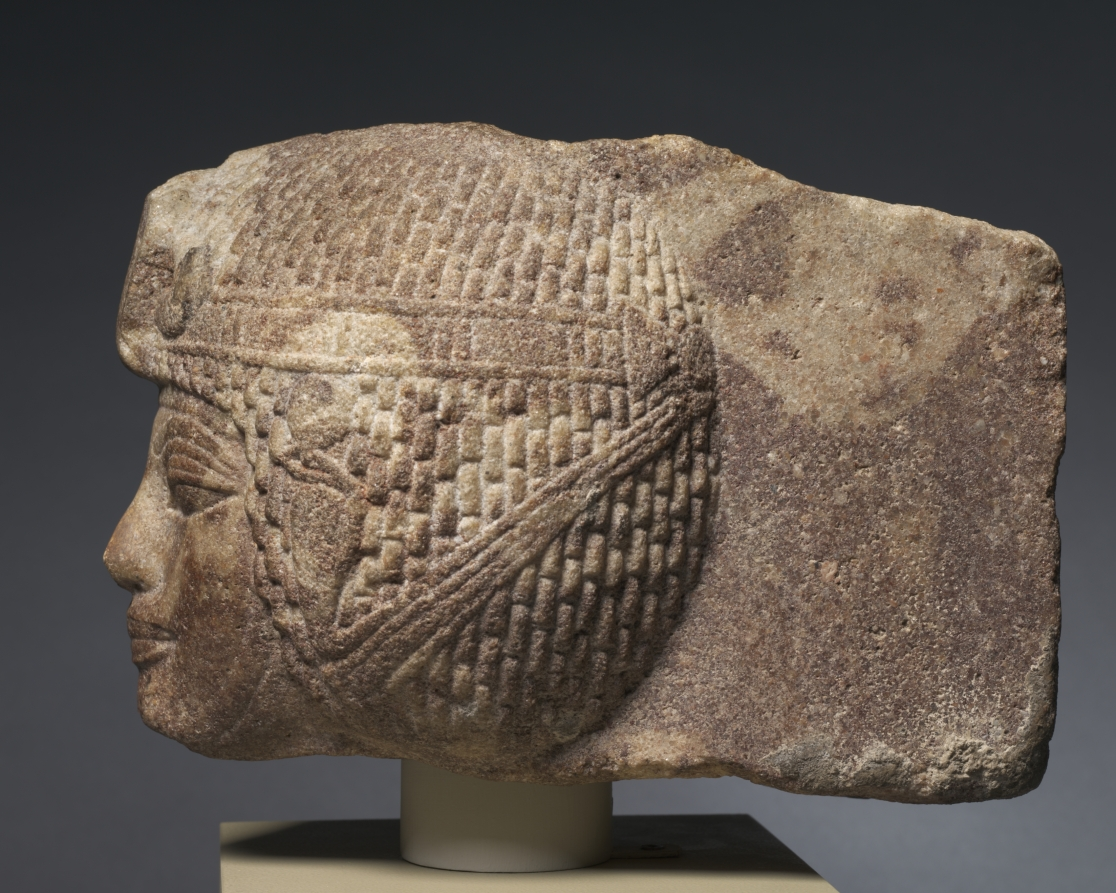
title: Head of Amenhotep III Wearing the Round Wig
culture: Egypt, New Kingdom (1540–1069 BCE), Dynasty 18, reign of Amenhotep III (1390–1352 BCE)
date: c. 1391–1353 BCE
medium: brown quartzite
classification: Sculpture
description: Although he must have been nearly 50 years old when this portrait was carved, Amenhotep III appears more youthful than ever. Over a round, curly wig he wears a diadem with side streamers adorned with cobras bearing sun disks on their heads. The stone quartzite was associated with the sun on account of its ruddy hues, ranging in color from brown to red to purple. It was a favorite of Amenhotep III, the king who called himself the "dazzling sun-disk of all lands."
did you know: Amenhotep wears a chin strap that would have held up a false beard.